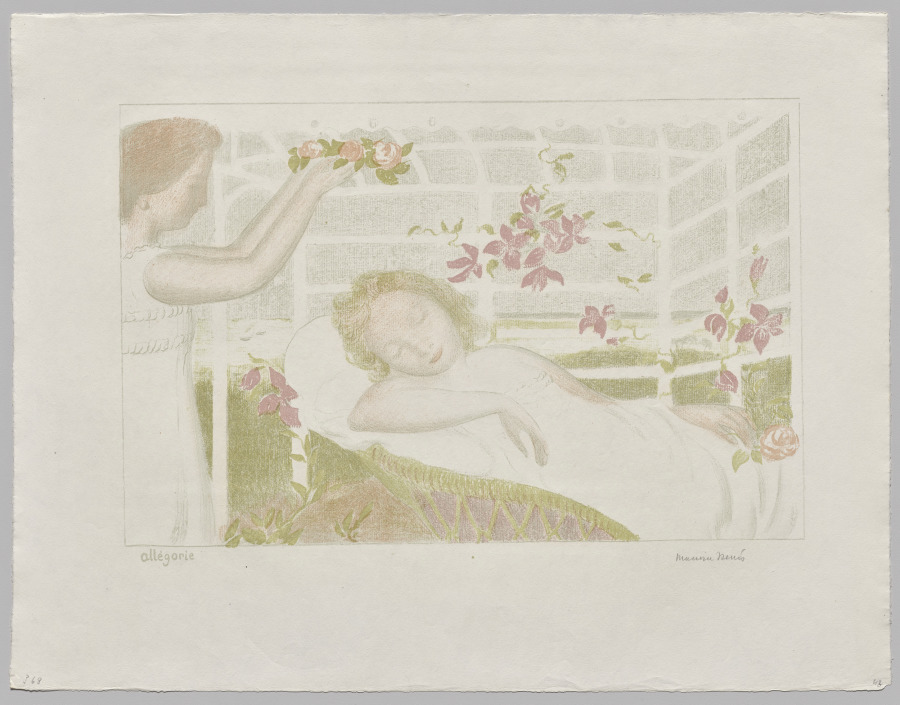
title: Allegory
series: Love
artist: Maurice Denis (French, 1870–1943)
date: 1899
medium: color lithograph on wove paper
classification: Print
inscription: Recto, lower left: “Allegorie”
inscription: In graphite, recto, lower right: “Maurice Denis (signed)”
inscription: In graphite, recto, lower left: “368”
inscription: In graphite, recto, lower right: “43”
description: Maurice Denis belonged to the Nabis, a group of artists who came together in 1889 to pursue a radical new style informed by subjective experience and emotion. This print is from a series in which Denis explored his devotion to his wife, Marthe, by depicting her in a variety of settings alongside titles drawn from his own journal. The vague but evocative images were meant to encourage the viewer to draw connections to the theme and meditate on its meaning.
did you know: Maurice Denis was a devout Catholic and often drew visual connections between his wife, Marthe, the subject of this print series, and the Virgin Mary.